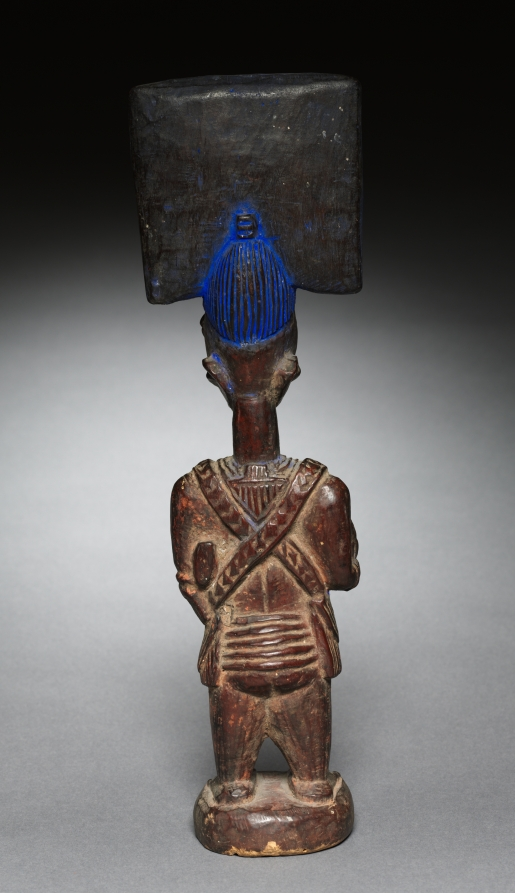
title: Shrine Figure for Sàngó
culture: Africa, West Africa, Nigeria, Yorùbá-style maker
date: c. 1910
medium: Wood, probably bluing, and organic material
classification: Sculpture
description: Sàngó is a king turned god in the Yorùbâ cosmology. One of the many òrìṣà—a god or divine spirit—that Yorùbá people can become devotees of and appeal to, Sàngó is often associated with lightning and thunder. The shape atop the female figure's head is the double-axe symbol of Sàngó. She wears a triangle-shaped amulet, waist beads, and bracelets, all signifying that she is a priestess. Standing on a base, rather than a handle, this figure was likely placed in a shrine dedicated to Sàngó.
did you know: The bright blue color on this sculpture is bluing, a powdered product used to brighten laundry.